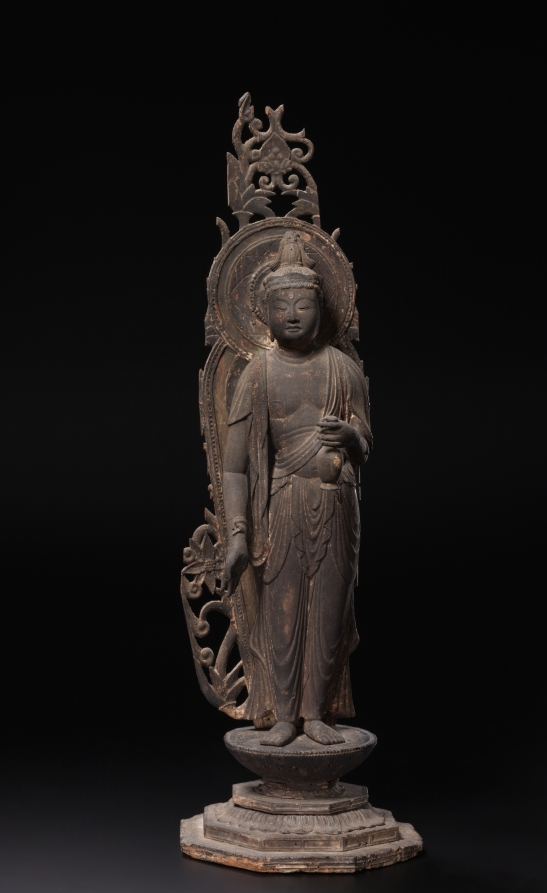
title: Miroku: Future Buddha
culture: Japan, Heian period (794–1185)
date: 1100s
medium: wood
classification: Sculpture